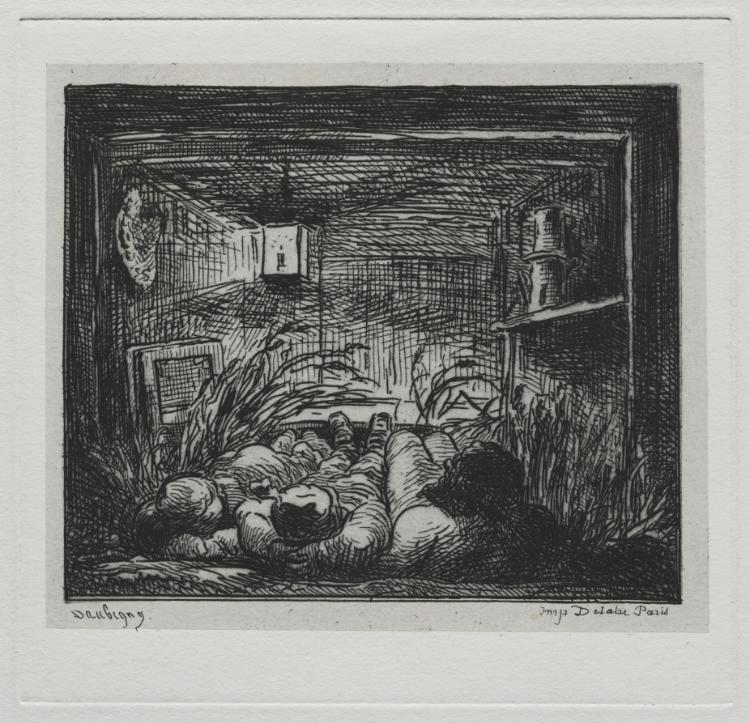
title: The Boat Trip: Bedding Down Aboard the "Botin" (Night on the Boat)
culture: France, 19th century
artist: Charles François Daubigny (French, 1817–1878)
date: 1861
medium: etching with chine collé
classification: Portfolio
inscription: lower left corner, in graphite: L. D. 113